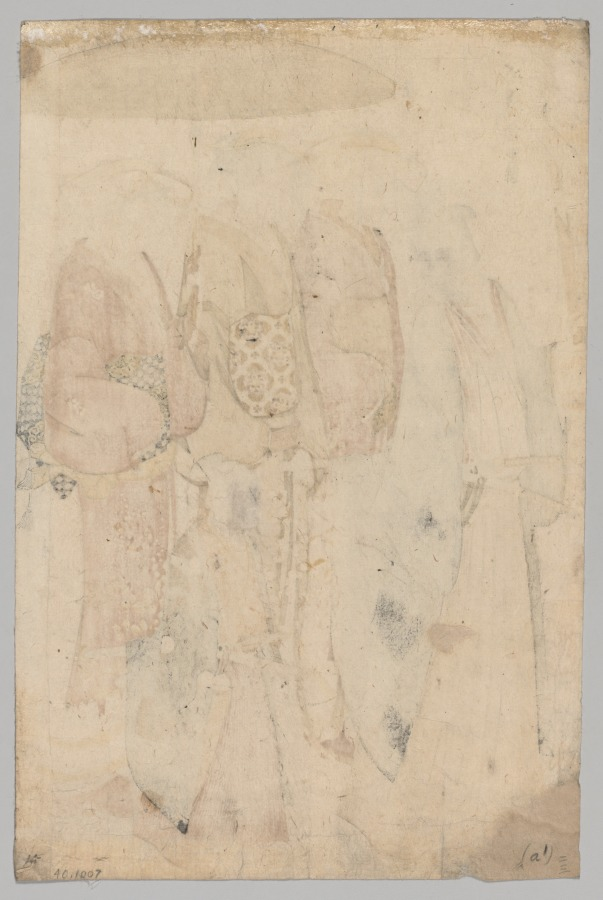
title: Woman of the Yoshiwara and Attendants (from the series Brocades of the East in Fashion)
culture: Japan, Edo period (1615–1868)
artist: Torii Kiyonaga (Japanese, 1752–1815)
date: 1752–1815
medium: color woodblock print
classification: Print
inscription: Signature: Kiyonaga gwa